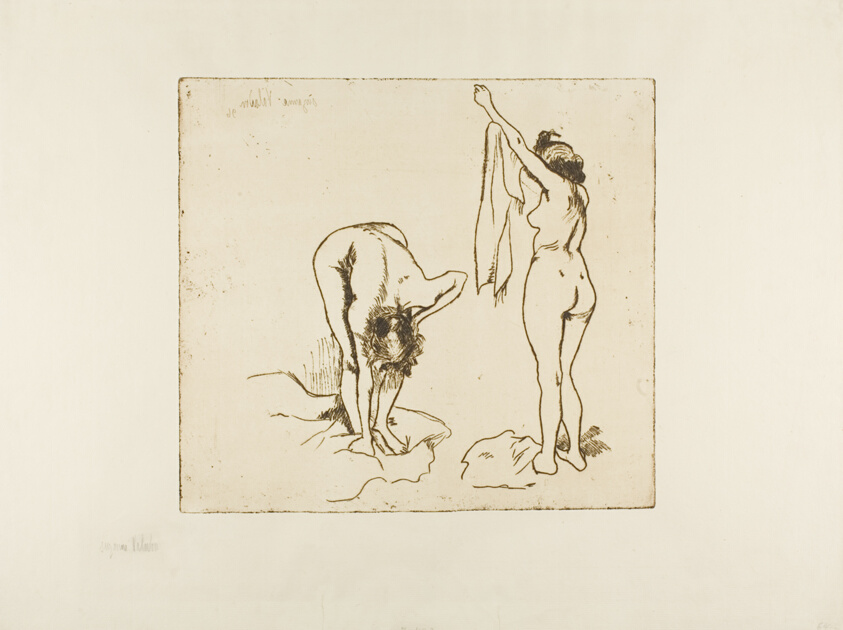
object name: Print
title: Two Women Drying Themselves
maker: Suzanne Valadon (French, 1865-1938)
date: 1896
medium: Soft ground etching with foul biting in dark brown on cream laid paper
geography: France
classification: soft-ground etching; etching; print; prints and drawing